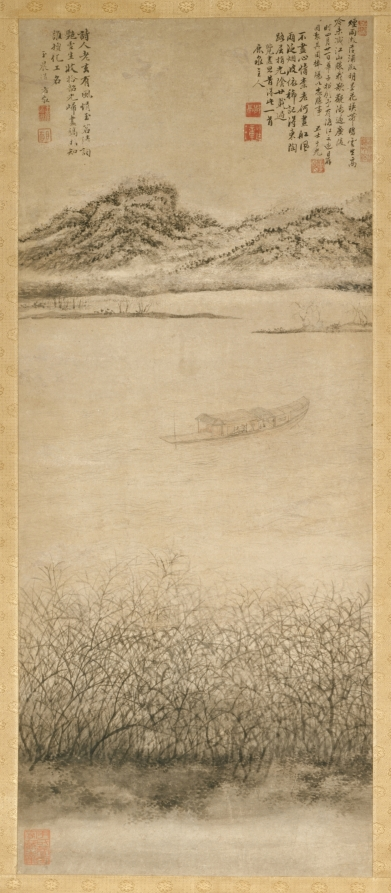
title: The Crossing of the Yangzi River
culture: China, Qing dynasty (1644-1911)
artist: Shang Rui (Chinese, 1634?-)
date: c. 1700–1720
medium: hanging scroll, ink and slight color on paper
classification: Painting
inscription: Colophons: One upper left inscription by the artist followed by two seals; one upper right inscription followed by two seals; three other seals, one in lower left